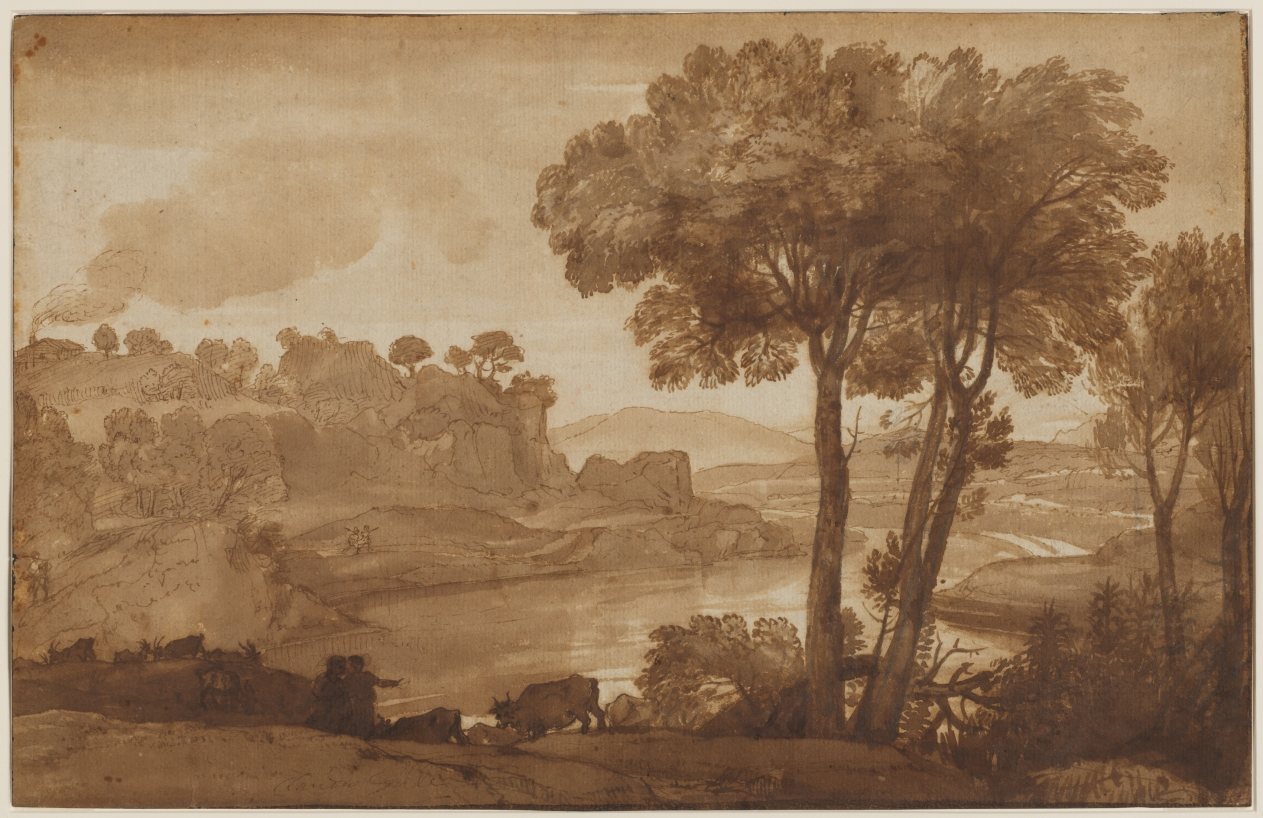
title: View of the Acqua Acetosa (recto)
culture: France, 17th century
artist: Claude Lorrain (French, 1604–1682)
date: c. 1645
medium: pen and brown ink and brush and brown wash over graphite, framing lines in brown ink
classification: Drawing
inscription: verso, lower left, in brown ink: beau peisage de claude Le Lorrain; lower left, in graphite: David; lower right, in graphite: Golia; upper center, in graphite: No 2599; lower center, in graphite: Claude Lorraine / From the Collection of / Lord Brownlow (The Belton / House Collection) / Signed Claudio Gellée.; lower left, in red watercolor: 55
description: This drawing represents a view of the famous Acqua Acetosa, a mineral spring that until the 19th century provided the favored drinking water of Romans who believed in its healing powers. Although topographically accurate, the sheet is not a plein-air study but a vision of an imagined Arcadian world carefully rendered by Gellée, one of the most original painters of the 17th century. The French-born artist spent his career painting and drawing the Roman Campagna and the Neopolitan coastline. Sublimely beautiful pen-and-ink and wash drawings such as the example here reveal the artist's highly poetic response to the natural world and his unparalleled sensitivity to light.